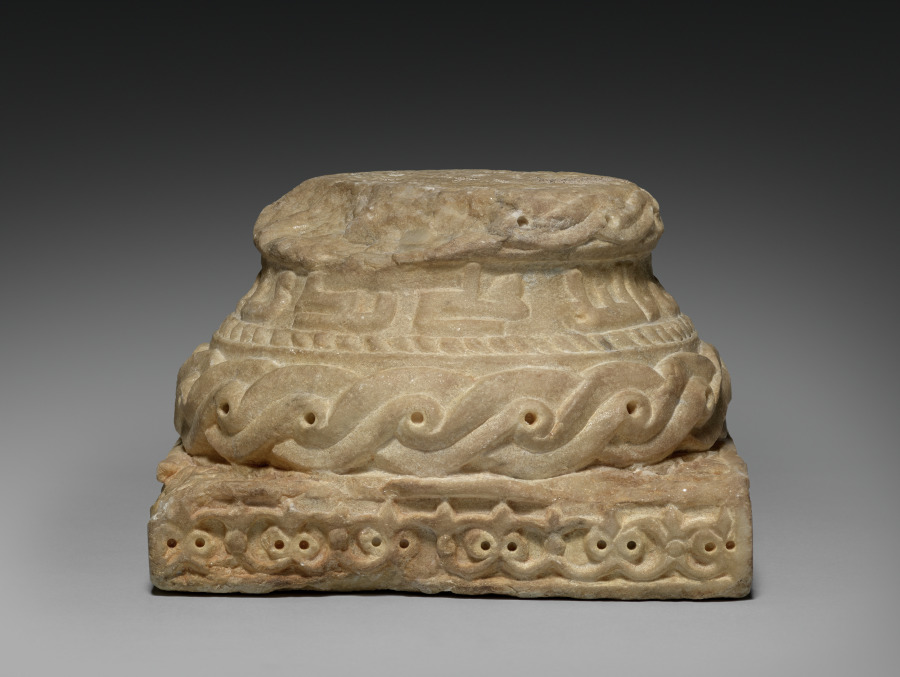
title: Column Base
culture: Spain, Cordoba, Spanish Umayyad period (756–1031)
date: c. 960–76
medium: Marble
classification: Sculpture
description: This base comes from the palatial city of Madinat al-Zahra near Cordoba (Spain) which was begun by caliph Abd al-Rahman III (r. 912–61) around 936. Large parts of the Iberian Peninsula were then under Islamic rule and experienced a cultural flowering. The city, destroyed already in 1010, was the most magnificent palace complex in Europe at the time.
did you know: In the mid-1800s the ruins of Madinat al-Zahra were rediscovered and the source of great fascination as people imagined a palace like that in the stories of 1001 Nights.